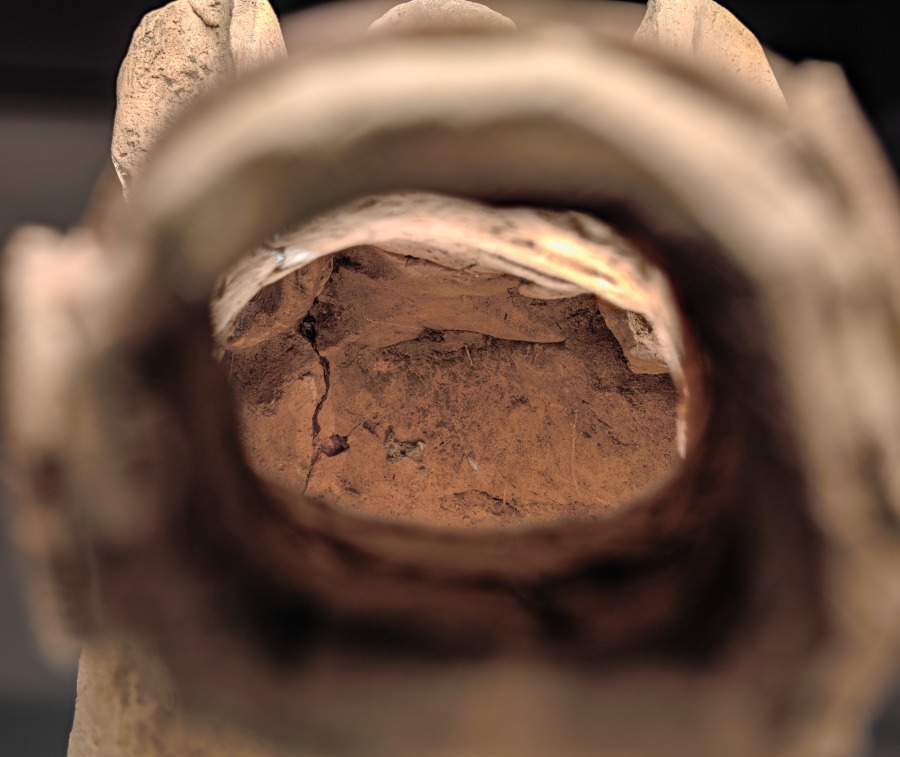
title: Haniwa Horse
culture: Japan, Kofun period (300–710 CE)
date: 400s–500s CE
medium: earthenware with traces of pigment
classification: Sculpture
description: This horse’s tack, with its round bells, resembles saddlery in fashion in Korea during the 400s–500s CE. Concurrent with mass migration from the Korean Peninsula, tombs covered with large earthen mounds similar to those on the Asian continent began to appear in Japan around the year 300 CE. Called “old mounds” (kofun), their surfaces were covered with hollow clay cylinders (haniwa). Sculptures of animals, buildings, and finally human figures followed, developing over the ensuing three centuries.